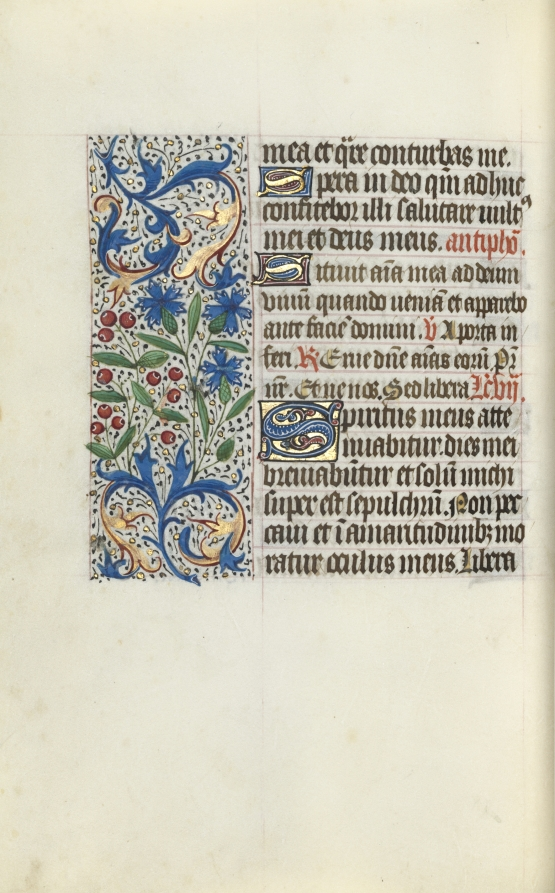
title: Book of Hours (Use of Rouen): fol. 130v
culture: France, Rouen, 15th century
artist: Master of the Geneva Latini (French, active Rouen, 1460–80)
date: c. 1470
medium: ink, tempera, and gold on vellum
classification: Bound Volume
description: In the late 1400s and early 1500s Rouen was an established and important center of book production. The city’s cathedral had a wealthy chapter that spent large sums of money to commission books and to maintain its extensive library. The stationers and booksellers would have likely been concentrated in or near the cathedral precinct. This artist, named after a manuscript now in Geneva, was Rouen’s principal illuminator during the second half of the 1400s.